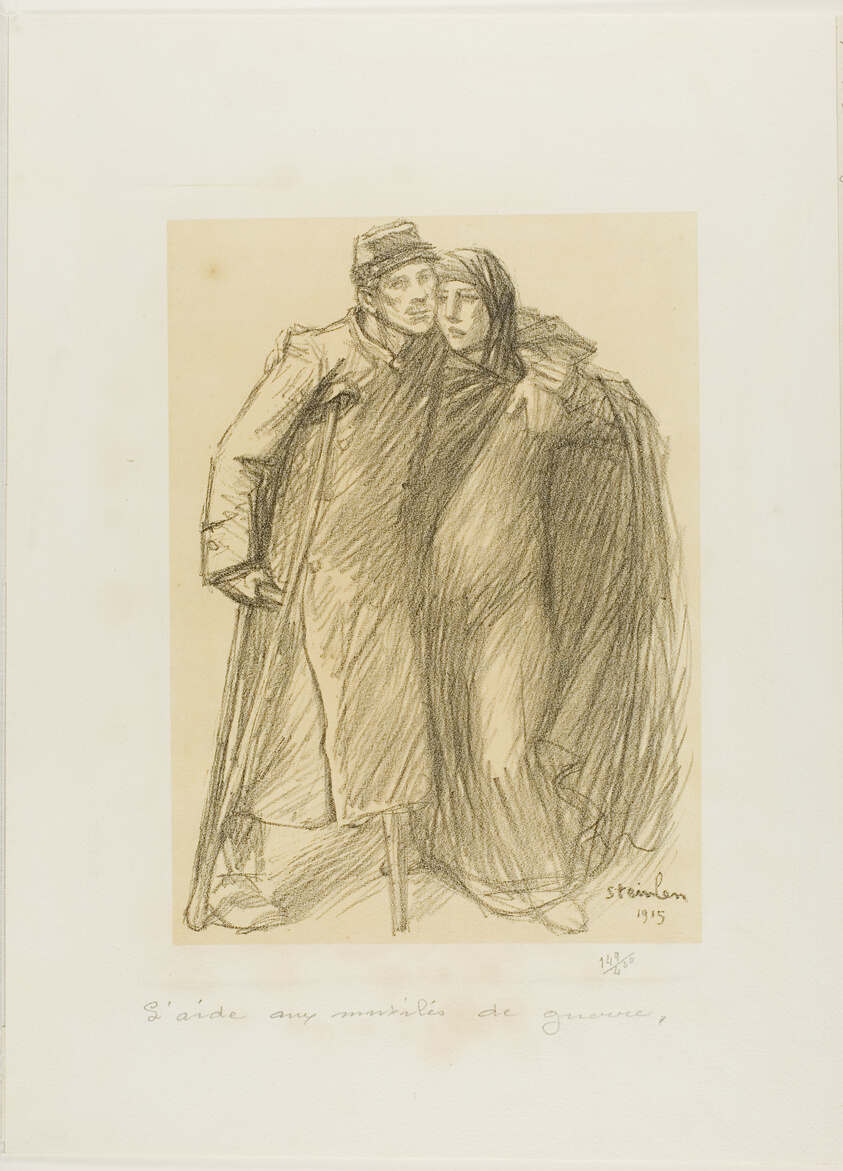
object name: Print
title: Aid to Those Mutilated in the War, plate one from Actualités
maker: Théophile-Alexandre Steinlen (French, born Switzerland, 1859-1923); printed by Eugène Delâtre (French, 1864-1938); published by d'Alignan, Paris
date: April 1915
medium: Lithograph in black over fawn tint on off-white wove paper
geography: France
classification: lithograph; print; prints and drawing